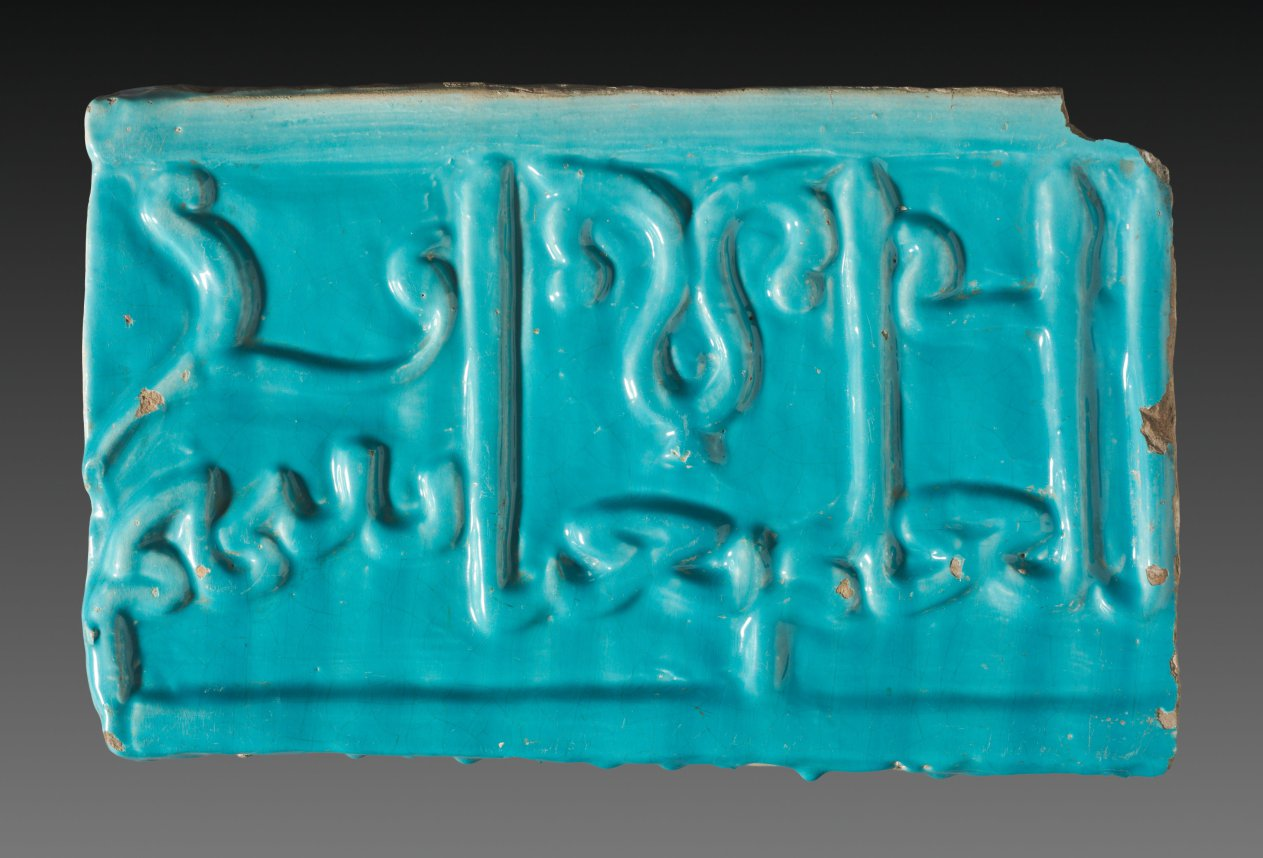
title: Wall Tile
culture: Iran, Ilkhanid period (1256–1353)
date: 1300s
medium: fritware with luster-painted design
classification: Ceramic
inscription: Naskhi inscription